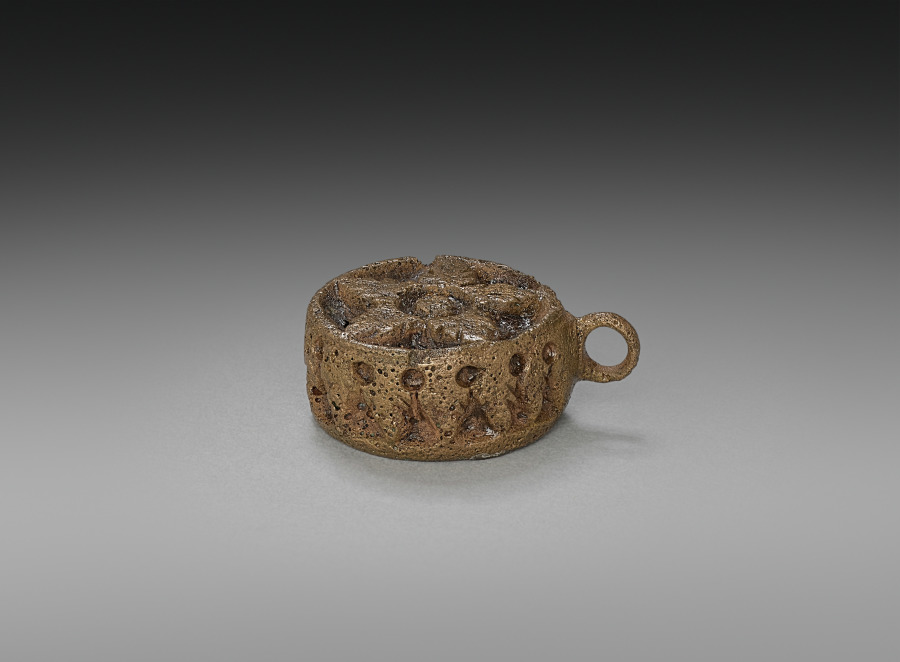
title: Kohl Tube (lid)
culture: Egypt, Greco-Roman period (332 BCE–395 CE), Ptolemaic dynasty (305–30 BCE)–Roman empire (30 BCE–395 CE)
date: 305 BCE–395 CE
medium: brass with blue enamel decoration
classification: Cosmetic Objects